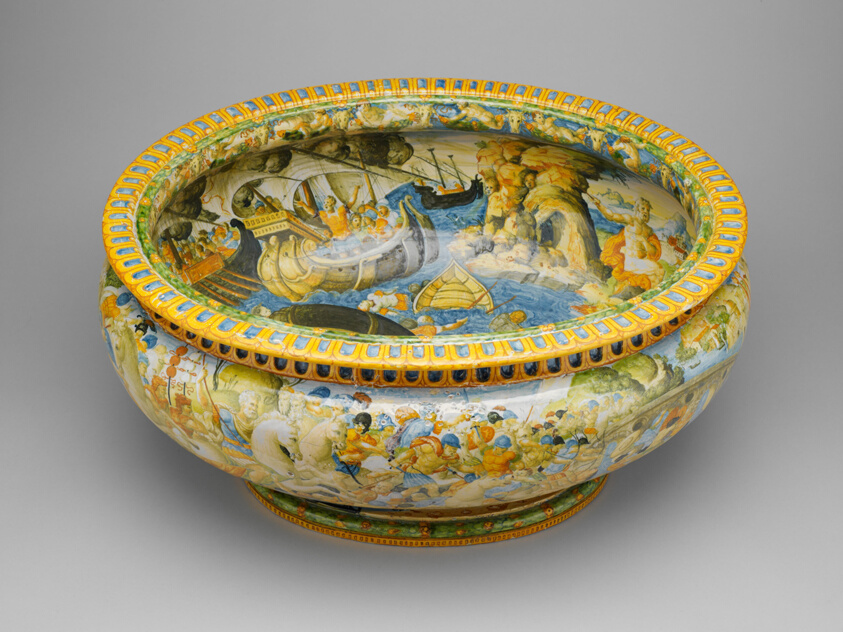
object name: Ceramics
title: Wine Cistern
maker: Francesco Durantino (Italian, active 1543-after 1553)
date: 1553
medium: Tin-glazed earthenware (maiolica)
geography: Italy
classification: earthenware; european decorative arts; ceramics; decorative arts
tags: ships, war, shipwrecks, soldiers, sailing, drowning, storms, death, animals, cityscapes, battles